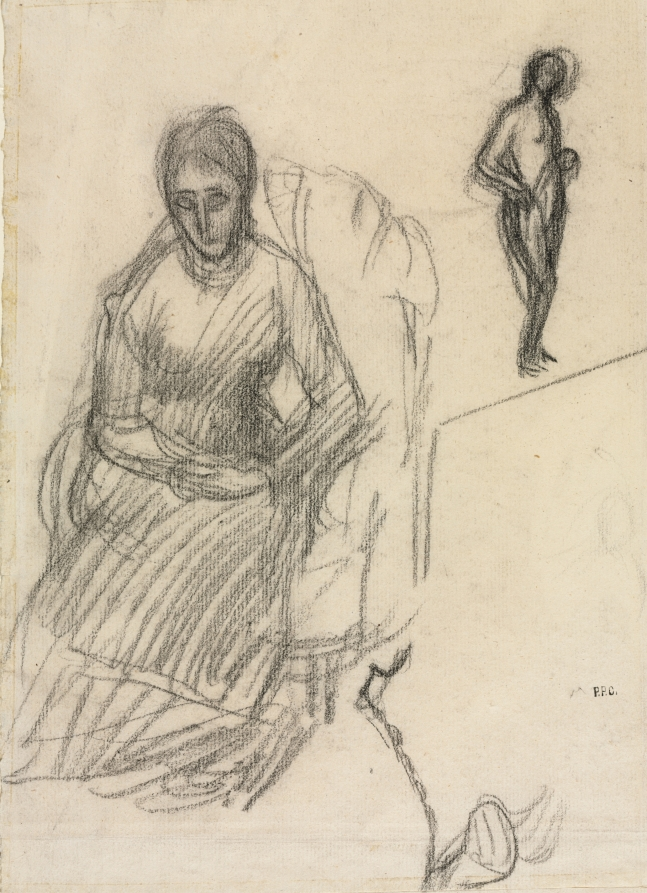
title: Study of Madame Marie Cantacuzène; Study of Standing Female Nude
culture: France, 19th century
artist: Pierre Puvis de Chavannes (French, 1824–1898)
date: c. 1883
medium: black chalk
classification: Drawing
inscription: Inscribed lower left in graphite: 43